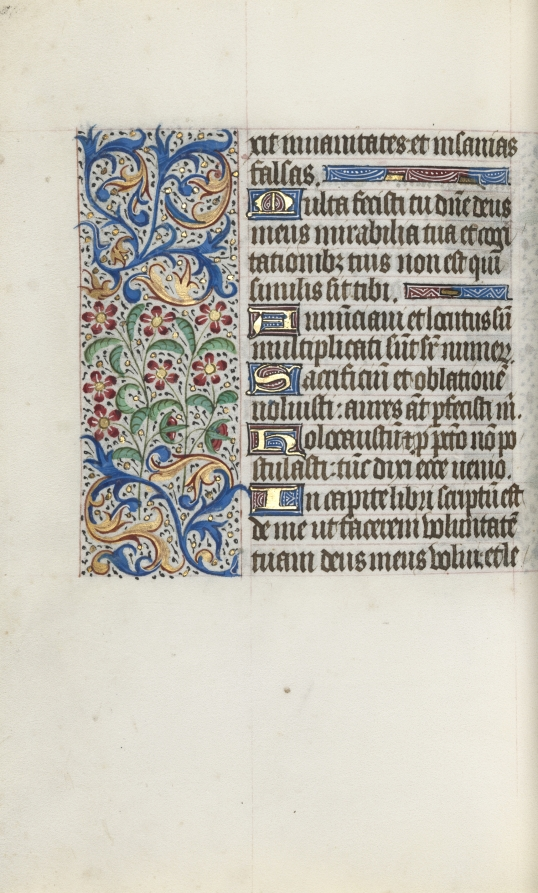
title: Book of Hours (Use of Rouen): fol. 125v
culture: France, Rouen, 15th century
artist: Master of the Geneva Latini (French, active Rouen, 1460–80)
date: c. 1470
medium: ink, tempera, and gold on vellum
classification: Bound Volume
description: In the late 1400s and early 1500s Rouen was an established and important center of book production. The city’s cathedral had a wealthy chapter that spent large sums of money to commission books and to maintain its extensive library. The stationers and booksellers would have likely been concentrated in or near the cathedral precinct. This artist, named after a manuscript now in Geneva, was Rouen’s principal illuminator during the second half of the 1400s.